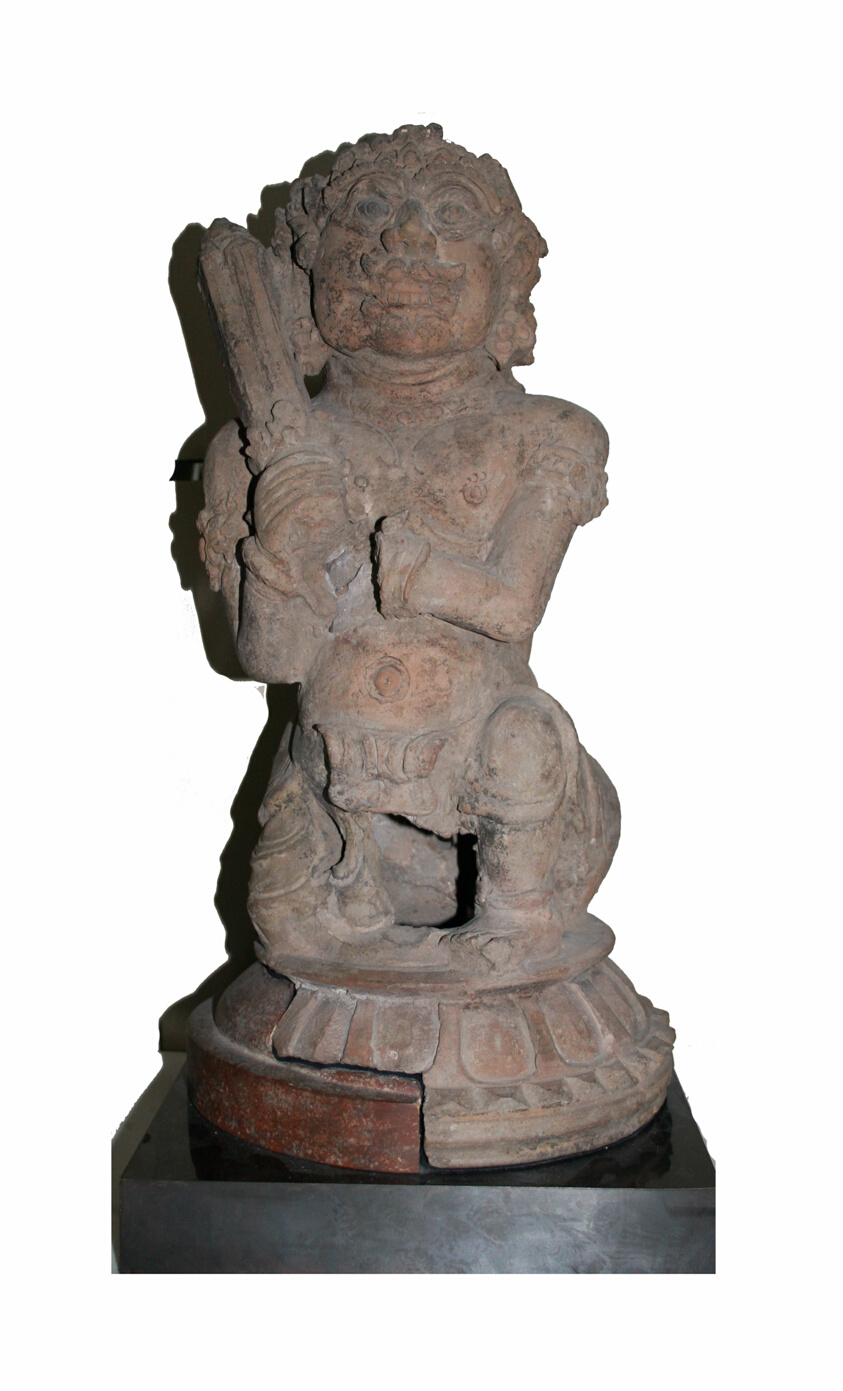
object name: Sculpture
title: Guardian Figure (Dvarapala)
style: Southeast Asian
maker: Indonesia; Java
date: 12th/14th century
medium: Terracotta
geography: Java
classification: sculpture; asian art